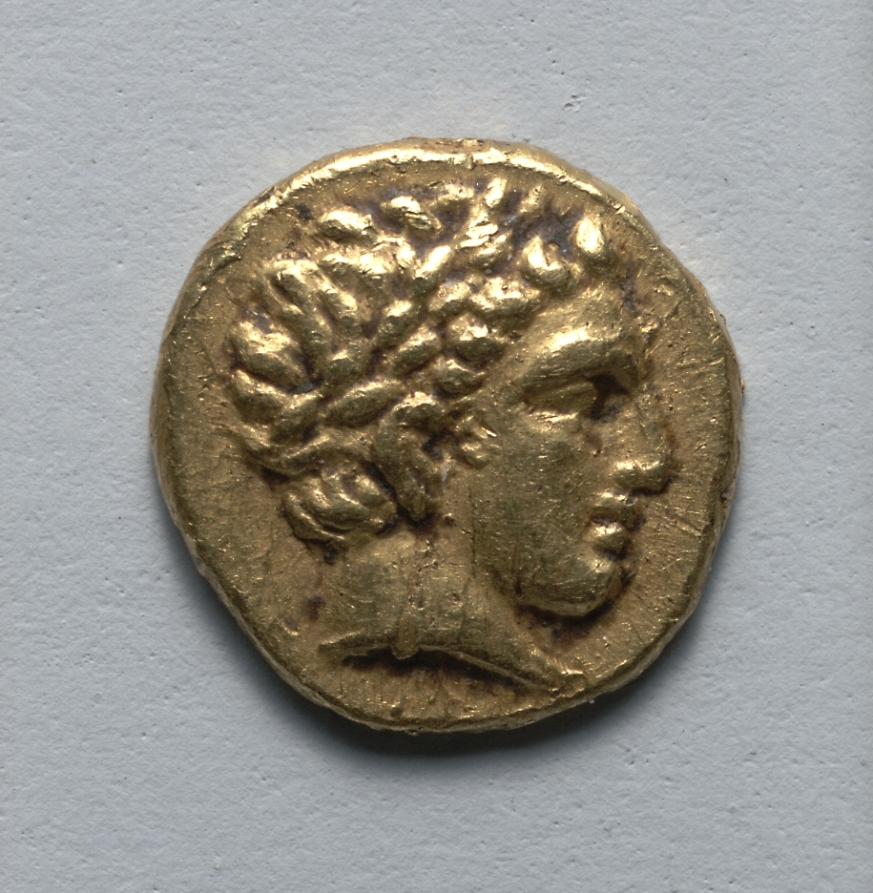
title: Stater: Head of Apollo r. (obverse)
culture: Greece, Macedonia, Reign of Philip II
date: c. 345–336 BCE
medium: gold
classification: Coins